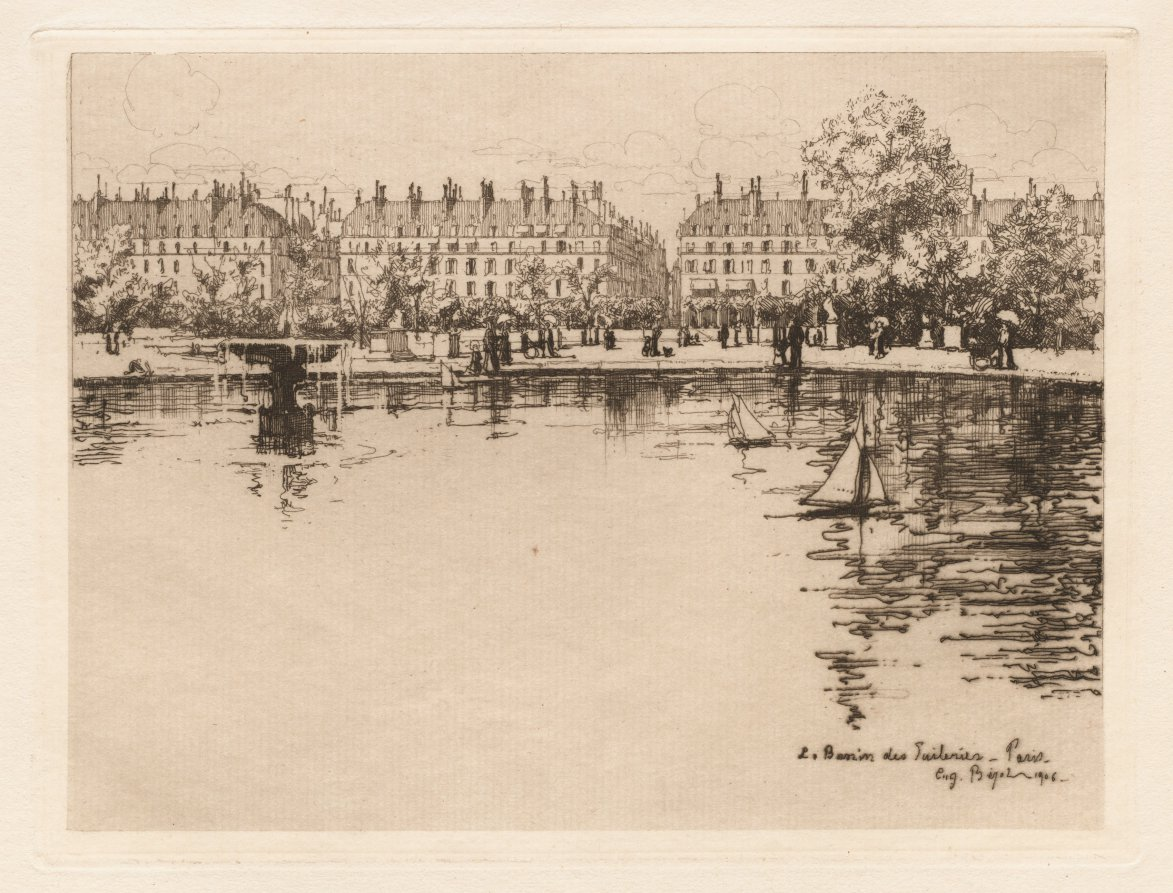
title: The Basin of the Tuileries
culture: France, 20th century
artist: Eugène Bejot (French, 1867–1931)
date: 1906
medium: etching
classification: Print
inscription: inscribed lower left, in plate: Le Baisin de Tuileries, Eug. Bejot